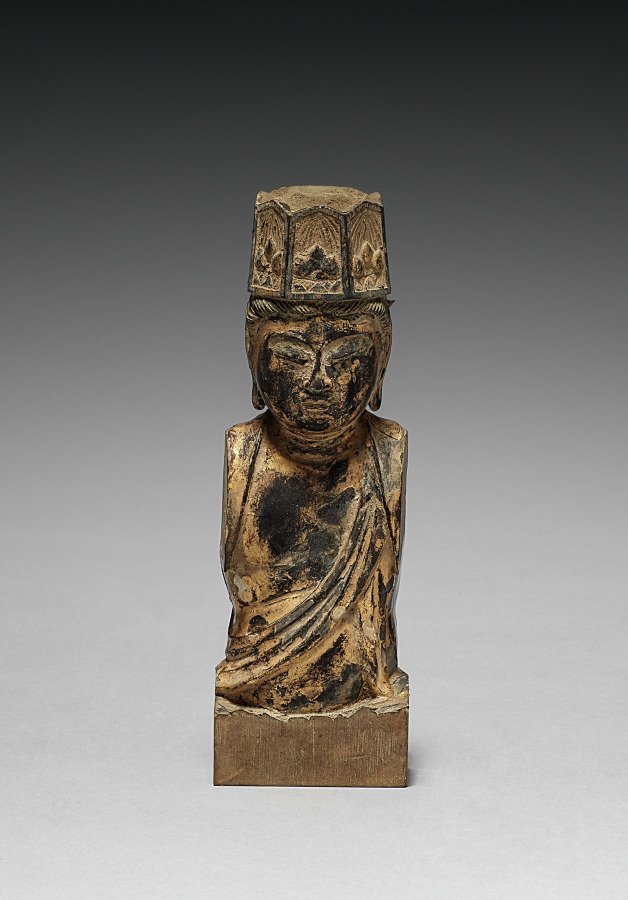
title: Bodhisattva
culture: Japan, Heian period (794–1185)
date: 900s-1100s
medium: gilded wood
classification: Sculpture